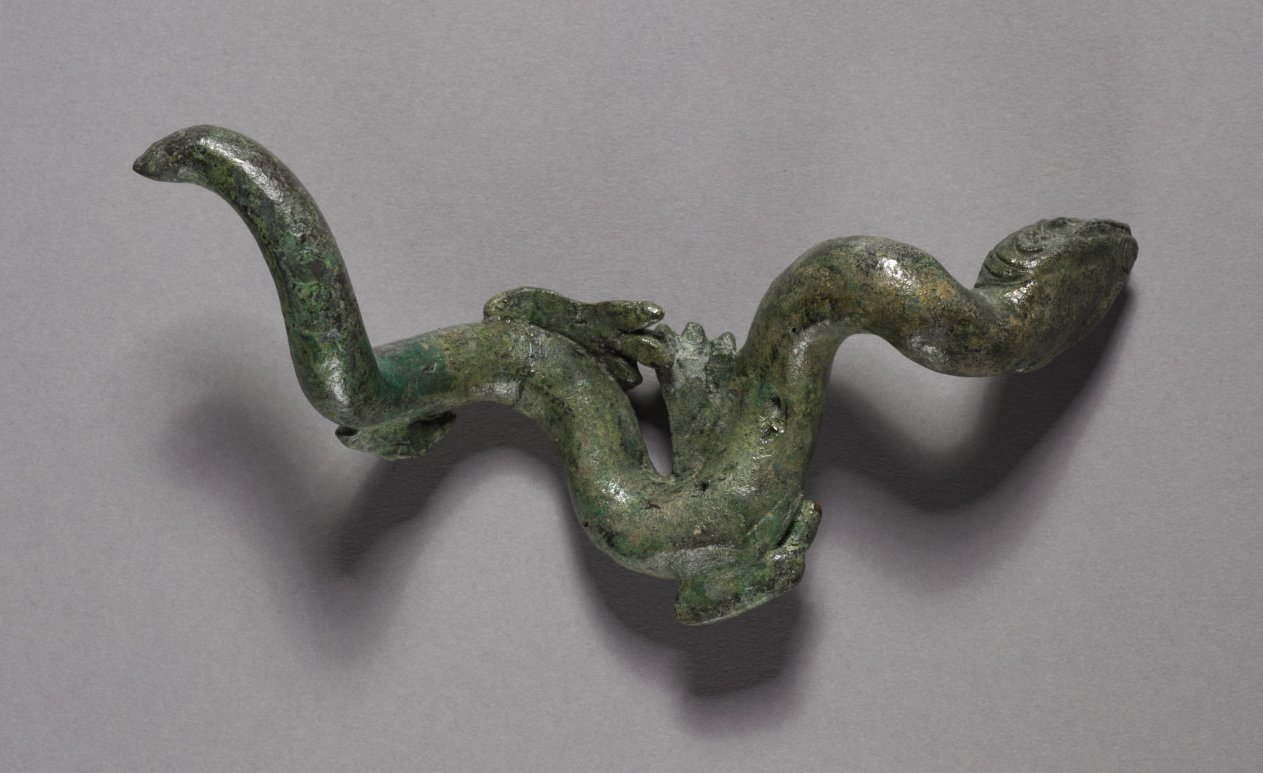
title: Detached Creature from the Cleveland Apollo: Apollo Sauroktonos (Lizard-Slayer) or Apollo the Python-Slayer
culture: Greece, Athens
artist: attributed to Praxiteles (Greek, Athenian, c. 400–330 BCE)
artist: or Follower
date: c. 350–200 BCE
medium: bronze, copper and stone inlay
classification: Sculpture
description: Both snakelike and lizardlike in appearance, the creature has a scaly head and four small feet. These are attached asymmetrically to its long and sinuous body, some with carefully delineated toes, others less detailed. The smallest foot falls behind a line bisecting the creature, where radiography shows a pin joining two separately cast sections. Although the bronze of the front and back halves is quite similar, the front half shows greater porosity (air bubbles). Perhaps the original back half was damaged during casting, necessitating a new or re-casting of that portion of the creature, with a smaller, relocated fourth leg.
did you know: Despite its small size, the creature was cast in two solid parts.